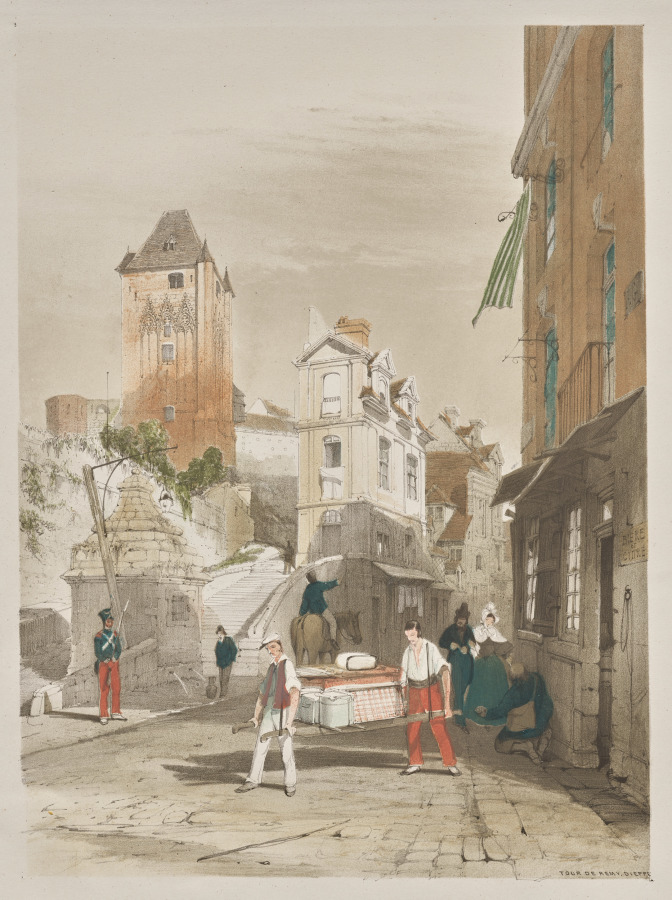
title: Picturesque Architecture in Paris, Ghent, Antwerp, Rouen: Tour de Remy, Dieppe, France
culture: England, 19th century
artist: Thomas Shotter Boys (British, 1803–1874)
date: 1839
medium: lithograph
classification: Portfolio